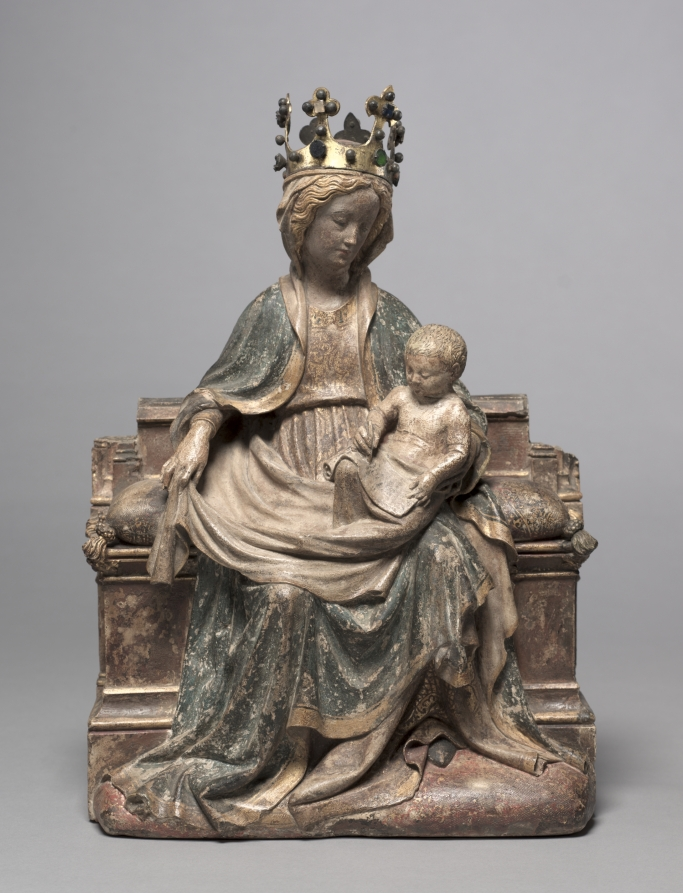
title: Enthroned Virgin with the Writing Christ Child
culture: Franco-Netherlandish, active Paris(?), 15th century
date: c. 1400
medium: limestone with polychromy and gilding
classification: Sculpture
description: This sculpture belongs to a tradition of seated Virgins that were prominent in Netherlandish art in the decades around 1400, and by extension may be associated with the Valois courts at Paris, Dijon, and Bourges. The theme of the Christ child who writes into an open book or onto a vellum banderole emerged during the third quarter of the 14th century and had great appeal among ecclesiastical and aristocratic clients. It undoubtedly refers to the educating and nurturing role of the mother in teaching the child, but also to the future position of the adult Christ as author and teacher. The small scale of this sculpture and the fact that its back is uncarved suggest that it was made for a small alcove or niche, appropriate in the intimate setting of a small chapel or oratory. The sculpture would have primarily been viewed from the front and perhaps from slightly below.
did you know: Here the Virgin is sitting on a highly decorated pillow.